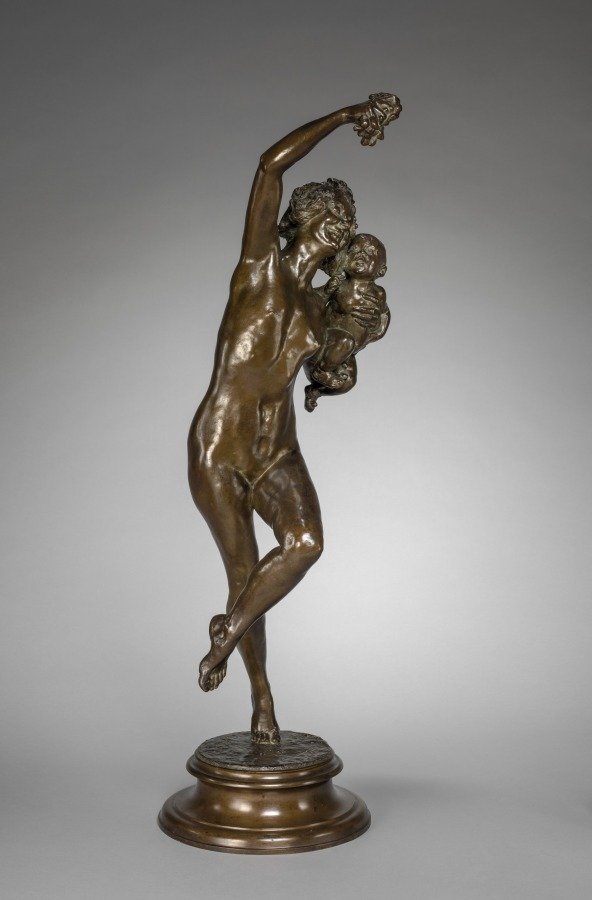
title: Bacchante and Infant Faun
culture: America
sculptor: Frederick William MacMonnies (American, 1863–1937)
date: 1894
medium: bronze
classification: Sculpture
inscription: Signed on base: F. Macmonnies, 1894.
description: This sculpture is a smaller version of a three-quarter life-size bronze given by the artist to Charles McKim, the architect for the Boston Public Library who placed the statue in the fountain of the library's courtyard. Although the vast majority of Bostonians supported the statue, a small but powerful group denounced it as "debauched," "vice-ridden," and "treason to purity and sobriety and virtue, and Almighty God." The opponents included the Boston Brahmins—a group of Anglo-Saxon, Protestant elite—and various religious, temperance, and antivice organizations. Feeling threatened by the swell of immigrants and by the changing roles of women, these groups hoped that the library would offer an alternative to the saloons frequented by Boston's lower classes. But a statue of a nude woman reveling under the effects of wine from the Roman god Bacchus only devalued this bastion of civilization. Consequently, the Boston Art Commission rejected the statue in 1897. However, in 1992 Boston's Art and Humanities commissioner and the library trustees returned a version of the original to the courtyard without public protest.